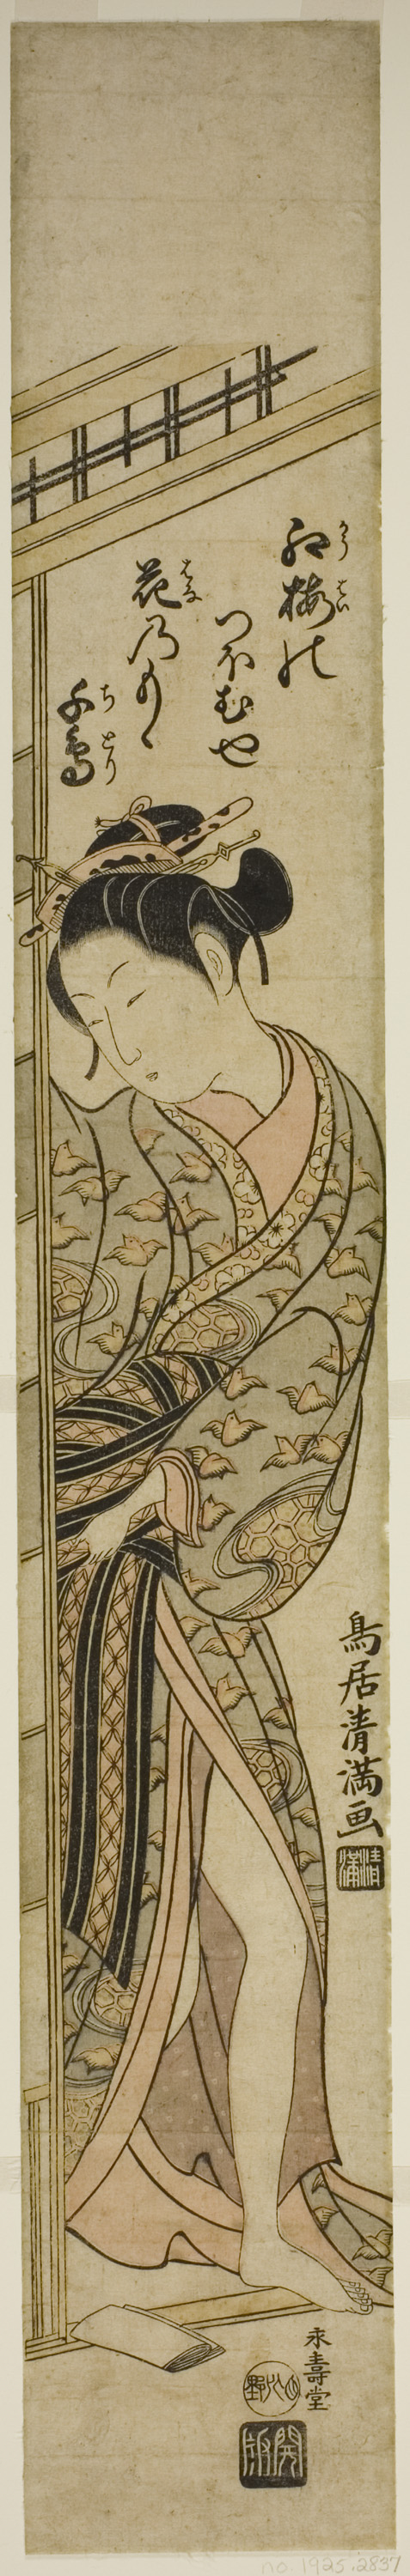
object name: Print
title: Young woman entering a room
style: Japanese (culture or style)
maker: Torii Kiyomitsu I (Japanese, 1735-1785)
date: c. 1760/64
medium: Color woodblock print; hashira-e, benizuri-e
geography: Japan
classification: woodblock print; print; asian art